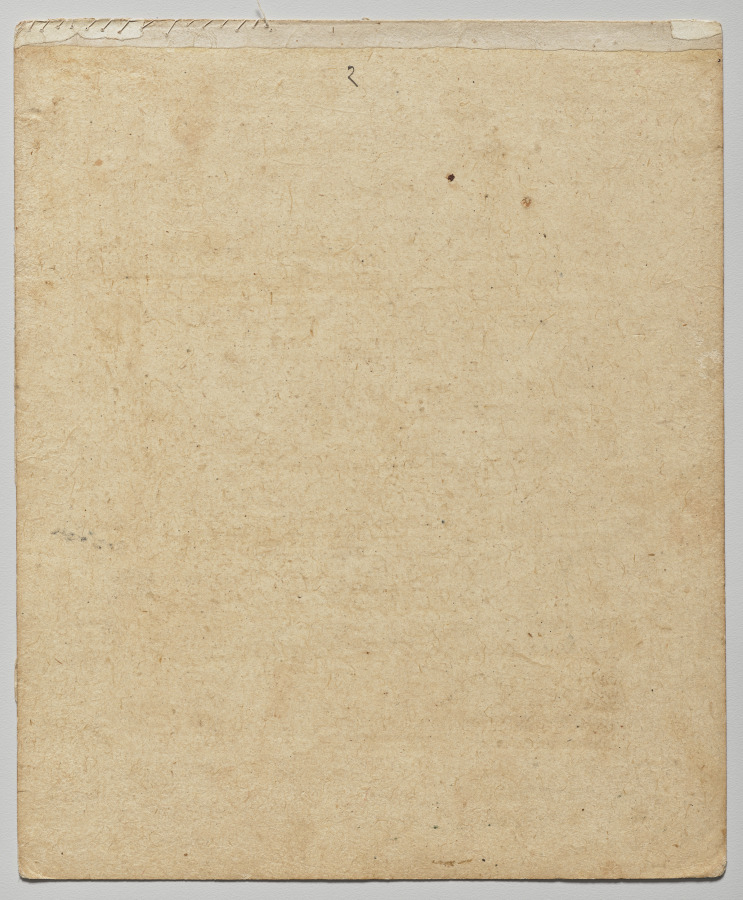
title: Taurus, from a "Mandi Astrology Series"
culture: Northern India, Pahari kingdoms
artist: attributed to Sanju (Indian, active late 1700s–early 1800s)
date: c. 1810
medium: Gum tempera and gold on paper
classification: Painting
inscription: The attached flysheet has a number, verse, and the stamp of the Mandi Royal Library, filled with the number 1296. The series number is 63, with the verse is number 2.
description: Standing for the astrological sign Taurus, the large-scale bull fills the space like a graceful icon behind a much smaller herd of cows. Pure white in color and in perfect profile, he has been adorned with a string of bells, a jeweled diadem, and decorative tips on his horns. A fine textile with gold leafy arabesque patterns sets him apart from oxen, dairy cows, and even the elephants in the distant background.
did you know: The oval format derives from the popularity of British cameos at the Mughal court.